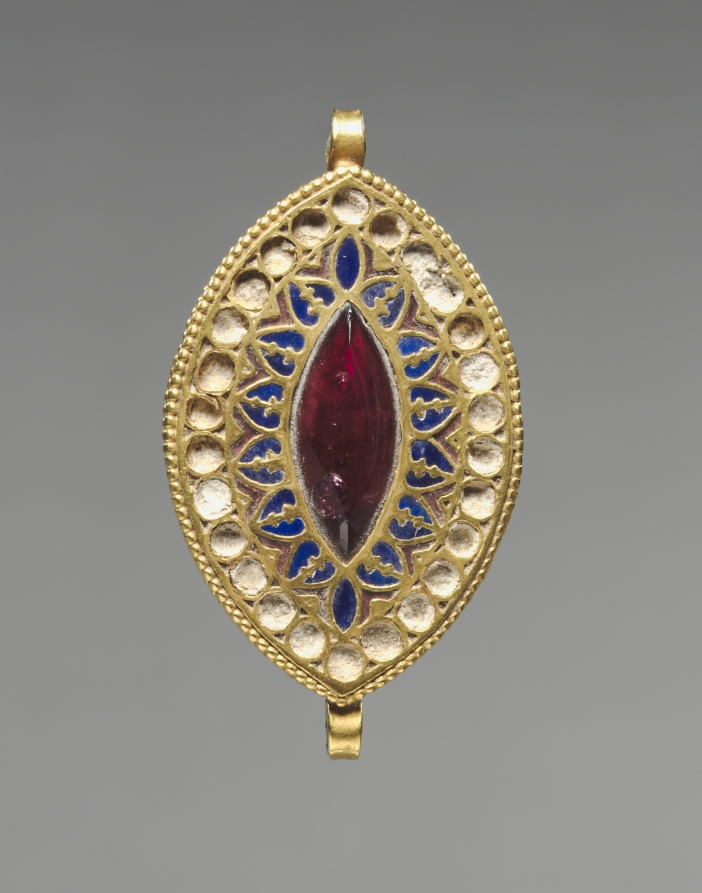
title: Almond-Shaped Pendant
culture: Byzantium, early Byzantine period, 5th-7th Century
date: 400–600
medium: gold, lapis lazuli, garnet, and glass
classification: Jewelry